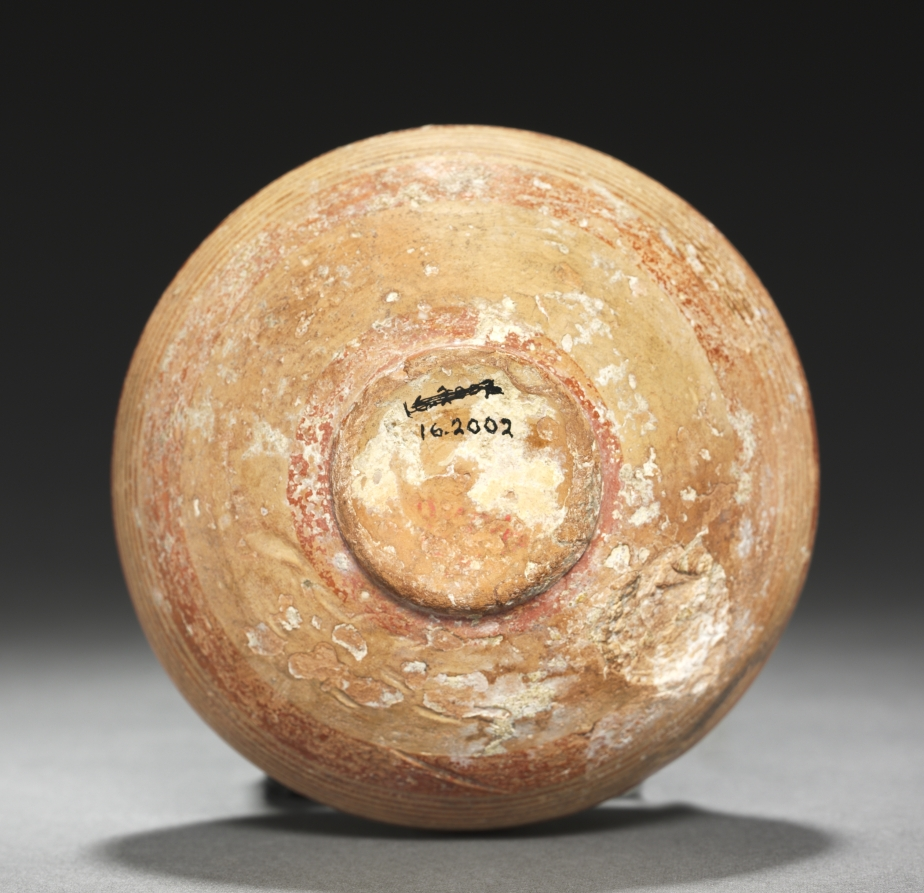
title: Miniature Stirrup Jar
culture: Cyprus, late Helladic III A2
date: c. 1350–1300 BCE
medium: Cypro-Mycenaean ware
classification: Ceramic